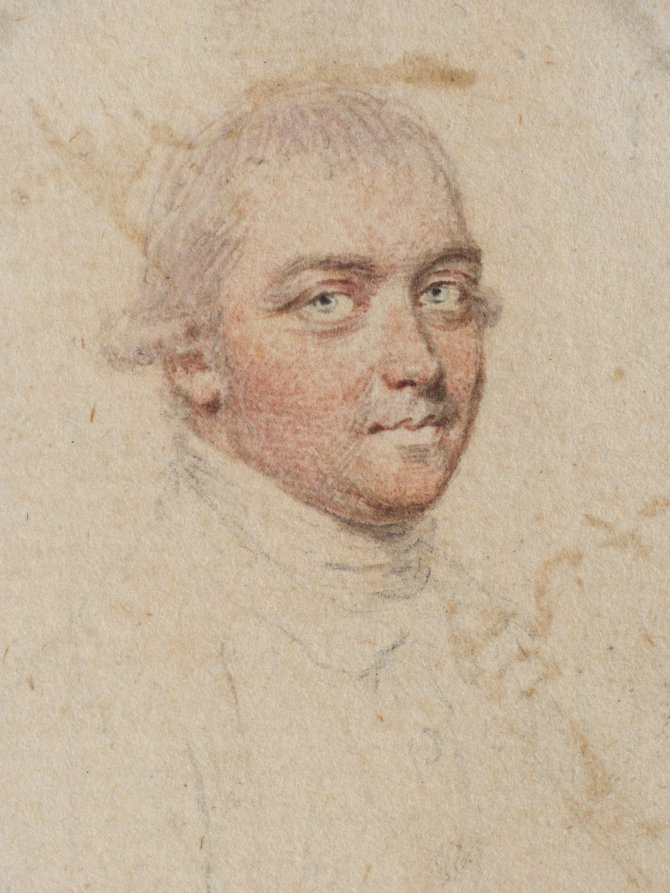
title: Portrait of Mr. Shippard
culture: England, 18th century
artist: John I Smart (British, 1741–1811)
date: c. 1776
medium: graphite and wash on laid paper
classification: Portrait Miniature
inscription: inscribed very faintly in graphite on front at upper right: 161; on back (paper backing to which drawing paper was adhered) inscribed in graphite, at top upside down: 161; also on paper backing in graphite, on a slant at lower left: Mr. Jones; inscribed on back of drawing, beneath paper backing, in graphite: Mr Shippar[d] large Bracelet size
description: Although it is impossible to say whether or not it was always part of the artist’s process to execute a preparatory sketch prior to painting each miniature, we do know that John Smart retained many hundreds of these sketches. A group of preparatory sketches—of which this portrait is one—descended through the Smirke family after Smart’s daughter Sarah gave a sketchbook containing preparatory portrait studies to her friend Mary Smirke, sister of the celebrated Victorian architect Sydney Smirke. This book was probably broken up around 1877 when its contents was divided between Sydney’s daughters Mary Jemmett and Mrs. Lange, whose portions were both sold at auction in 1928. G. C. Williamson was the first to suggest that Smart’s sketches were well known and that they were preparatory studies for the painted miniatures. Williamson listed the names of sitters from the sketches known to him at the time, and they include a Mr. Jones, the title formerly given to the sketch here. This designation was applied only to a paper backing that had been attached after the drawing had been removed from the sketchbook. There is no further evidence for this attribution, however. The sketch is of the sitter’s head only, with a slight suggestion of a high stock collar. His head faces to the left, and his light hair is combed straight back with a flat curl above his right ear. He is depicted in an oval, and the background is unpainted. The number 161 is inscribed in graphite on both the front of the drawing and its paper backing. Upon removal of the paper backing in 1993, an inscription in graphite was revealed. Perhaps written in the artist’s hand, it suggests that the sitter’s name may be Mr. Shippar[d]. There are no known portraits of this gentleman. The work can be dated to about 1776 because of its size, which, when painted on ivory, would have been around 2 inches in height. An inscription on the back of the drawing suggests that the miniature was to be mounted on a bracelet. To this date, the finished ivory for which this preparatory sketch was presumably undertaken has not been discovered.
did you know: Sketches helped John Smart work out the particulars of a portrait before commencing the miniature on ivory, and they were useful in the event that a duplicate might later be required.